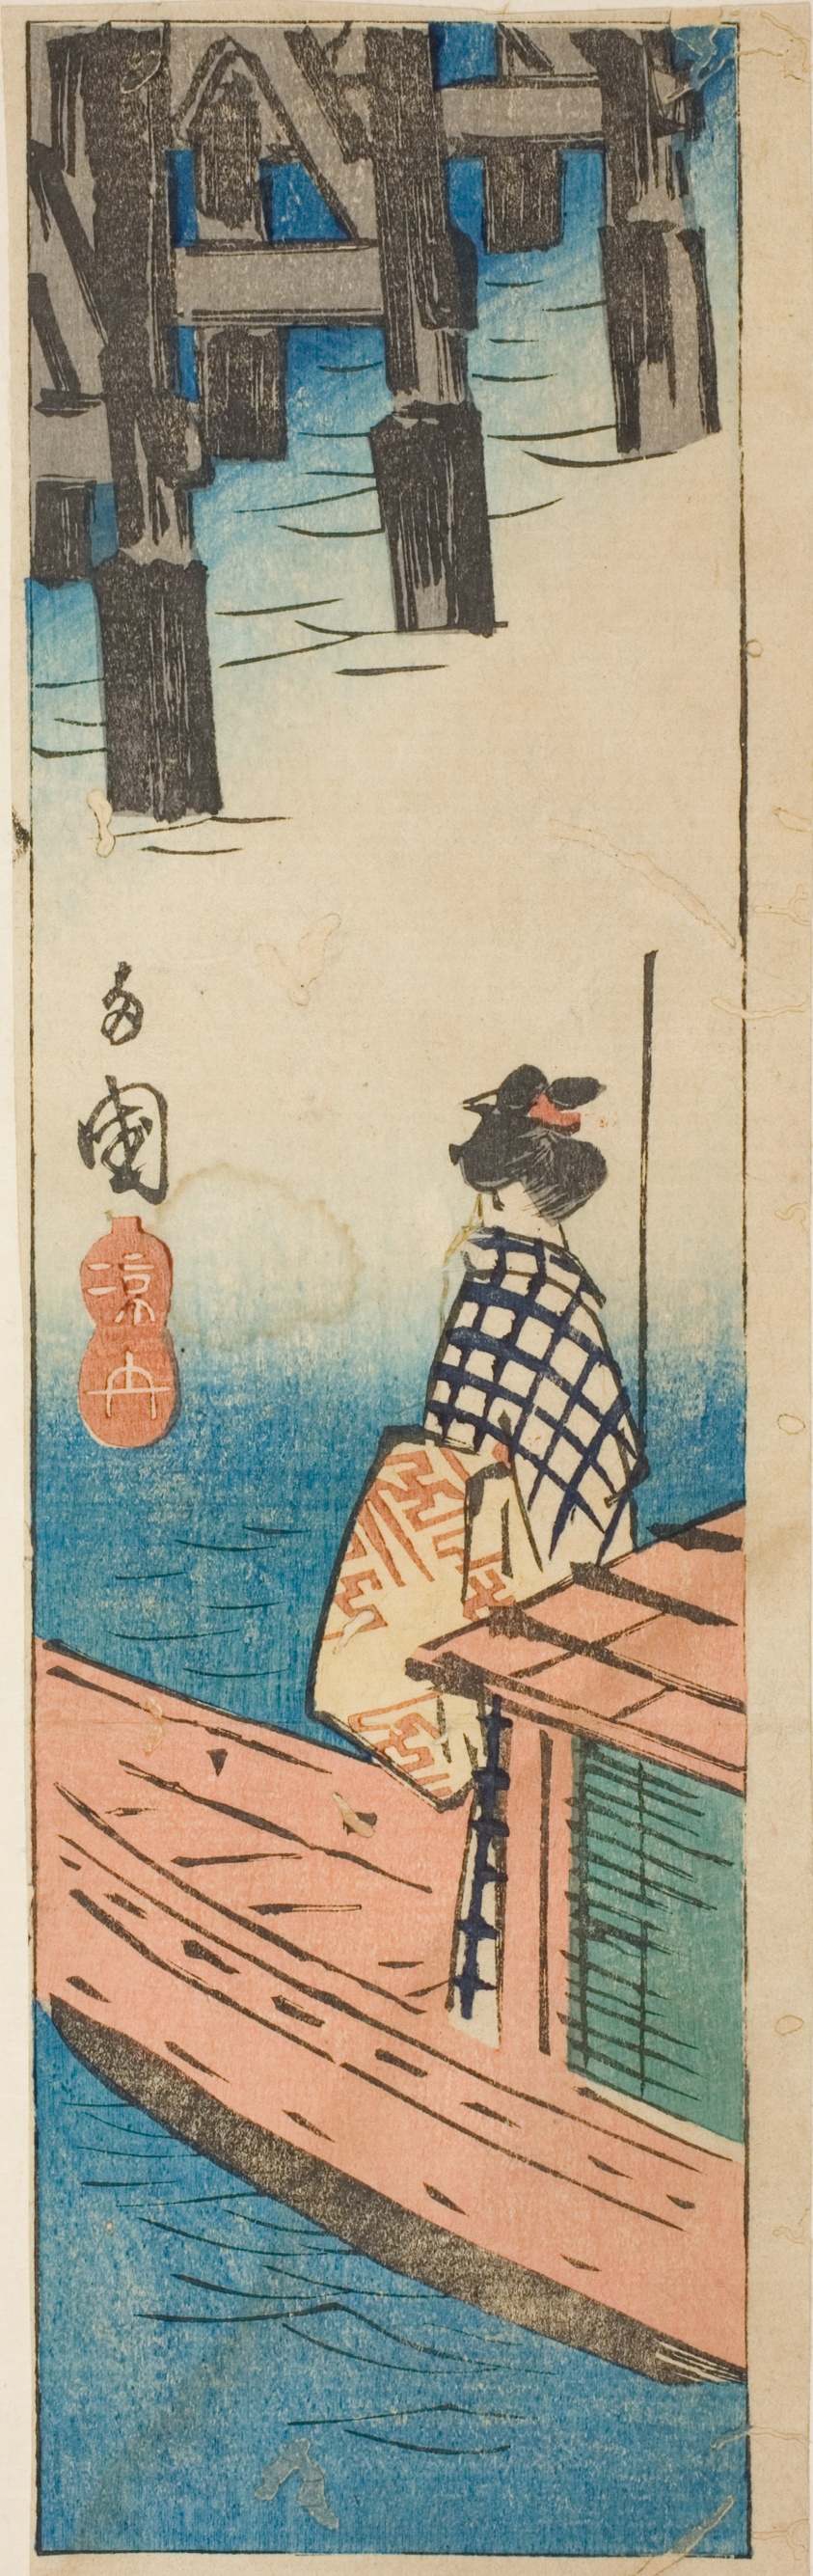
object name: Print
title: Pleasure Boat at Ryogoku Bridge (Ryogoku suzumibune), section of a sheet from the series "Cutouts of Famous Places in Edo (Harimaze Koto meisho)"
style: Japanese (culture or style)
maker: Utagawa Hiroshige 歌川 広重; Japanese, 1797-1858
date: 1852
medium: Color woodblock print; section of harimaze sheet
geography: Japan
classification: woodblock print; print; asian art